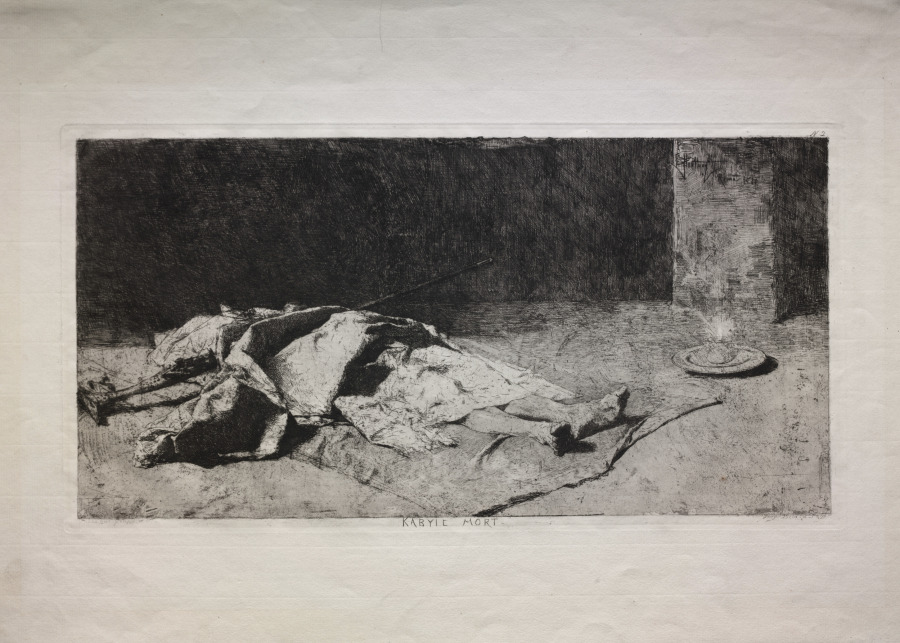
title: Dead Kabyle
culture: Spain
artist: Mariano Fortuny (Spanish, 1838–1874)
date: 1867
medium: etching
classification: Print